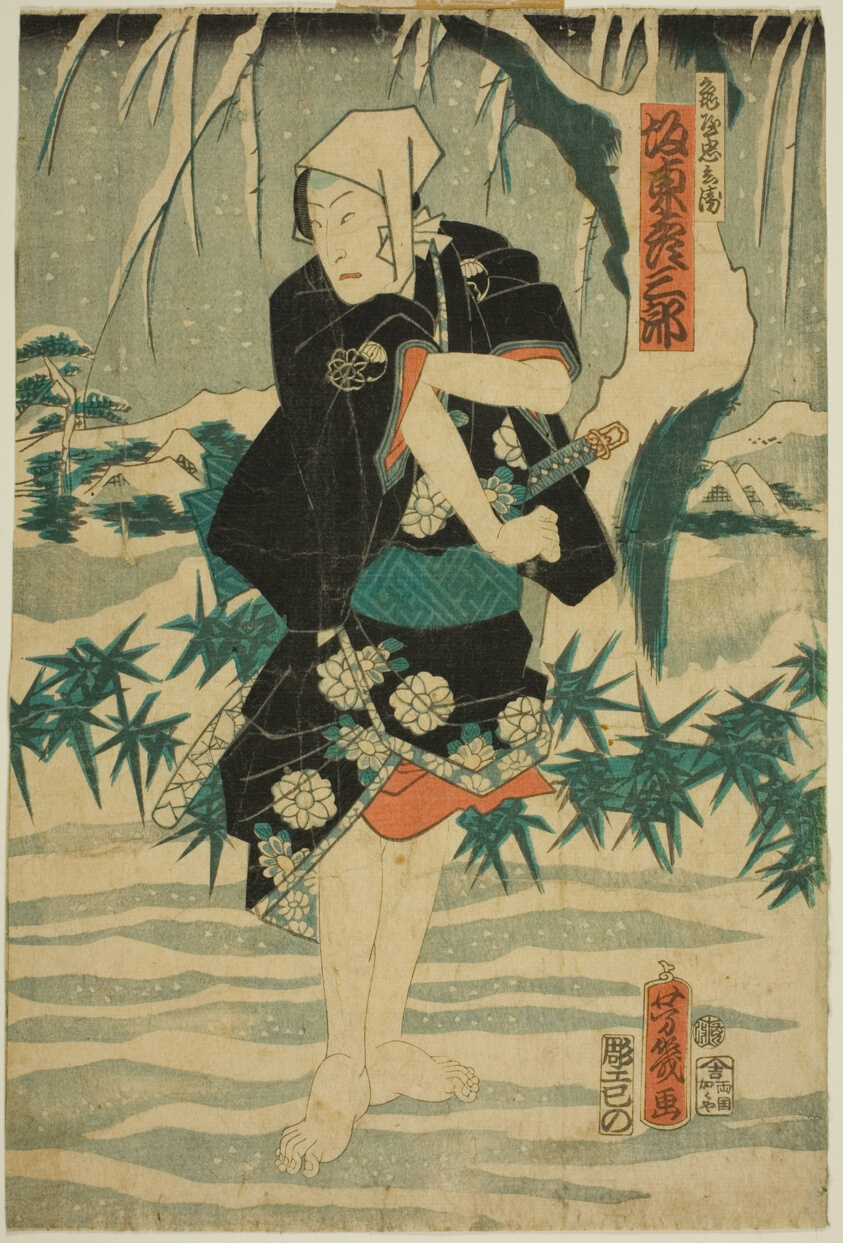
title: The Governor Hida no Kami Masakiyo Kataoka Nizaemon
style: edo (japanese period), Japanism, East Asian, asian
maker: Utagawa Toyokuni III; Japanese, 1786-1864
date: 19th century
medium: Color oodblock print, ink and colors on paper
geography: Japan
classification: woodblock print; print; asian art